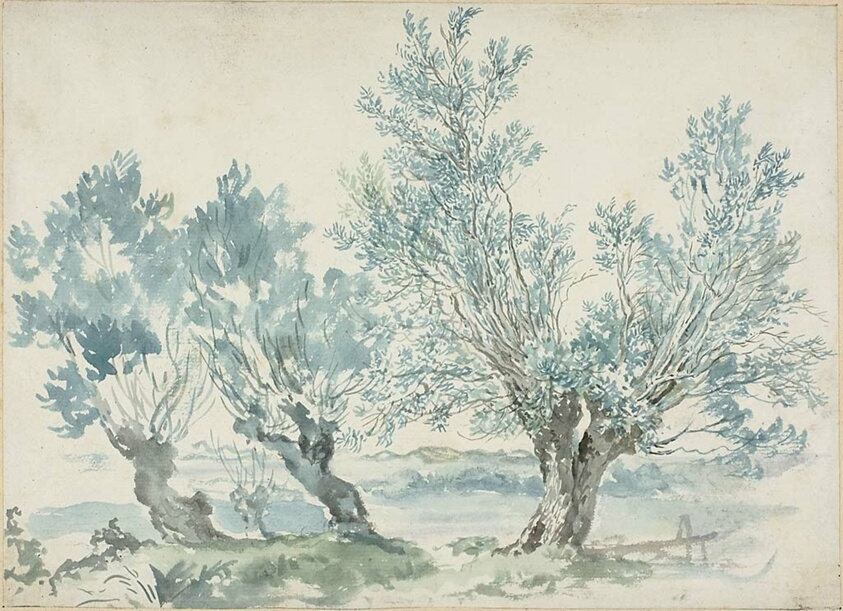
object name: Drawing and Watercolor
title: Three Willow Trees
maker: Possibly Louis Gabriel Moreau (French, 1740-1806); or Jean-Honoré Fragonard (French, 1732-1806)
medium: Brush and blue and gray wash, over traces of black chalk, on ivory laid paper, edge-mounted on buff laid paper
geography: France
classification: ink or chalk wash; drawings (visual works); prints and drawing